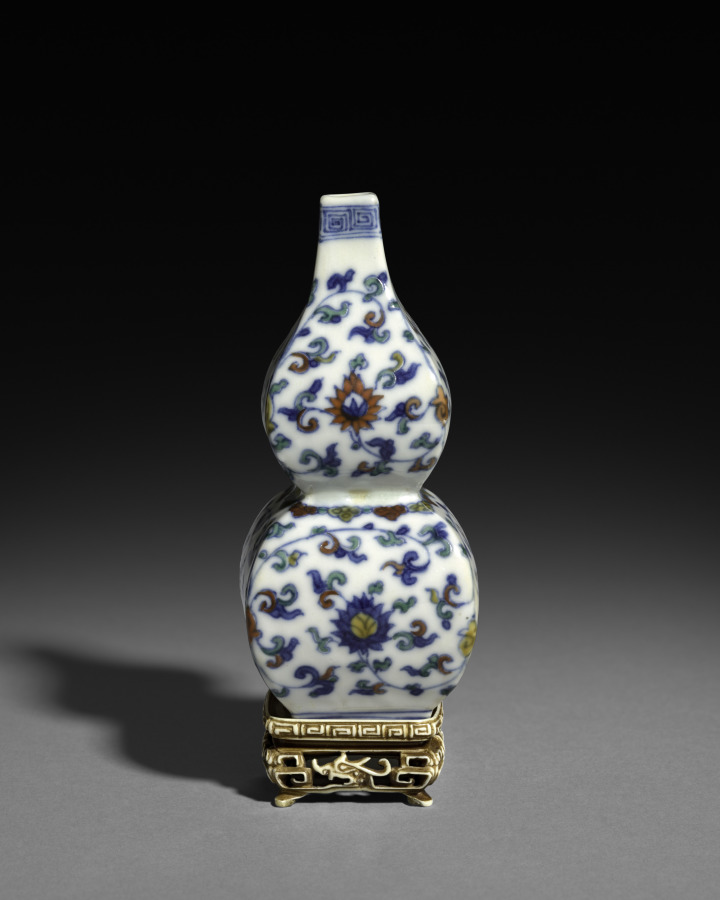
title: Square Double-Gourd Vase with Floral Scrolls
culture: China, Jiangxi Province, Jingdezhen kilns, Ming dynasty (1368–1644), Jiajing mark and reign (1522–66)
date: 1522–66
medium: porcelain with underglaze blue decoration and overglaze enamel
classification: Ceramic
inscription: 大明嘉靖年製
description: In the Ming dynasty (1368–1644), luxury items became more affordable to larger parts of the society, including women, merchants, and literati in non-official positions. Imperial patronage and a growing urban population encouraged consumption of luxury goods and local craftmanship.